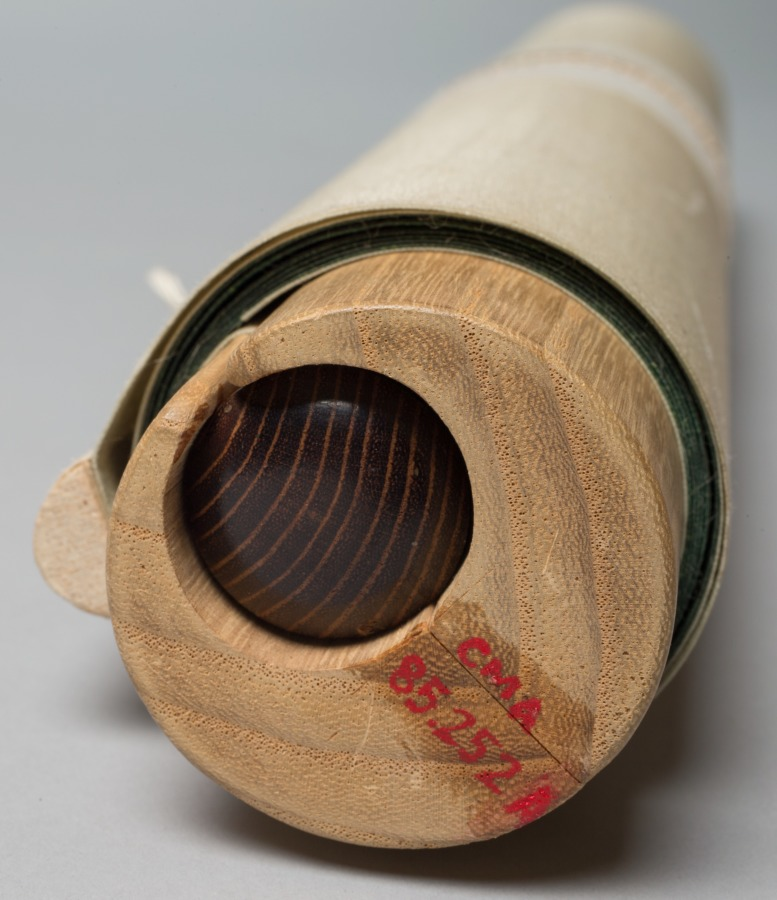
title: Spring Dancers (Manzai)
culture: Japan, Edo period (1615–1868)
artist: Miyagawa Chōshun (Japanese, 1683–1753)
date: early to mid-1700s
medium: hanging scroll; ink and color on paper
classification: Painting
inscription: Artist's signature and gourd-shaped seal lower right corner.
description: Manzai is the Japanese term for wandering comic dancers. The painting depicts one of the traditional pleasures of the spring season.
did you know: One performer is playing a hand-held drum, like CMA 1918.349.